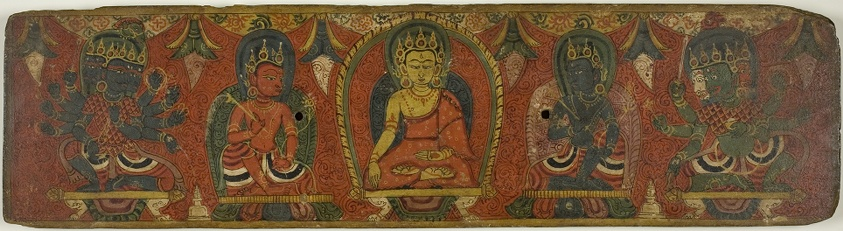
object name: Religious/Ritual Object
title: Manuscript Cover with Buddha, Two Bodhisattvas and Two Protective Deities (Lokapalas)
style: Himalayan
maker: Nepal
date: c. 1575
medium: Pigments on wood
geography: Nepal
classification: manuscript; ritual objects